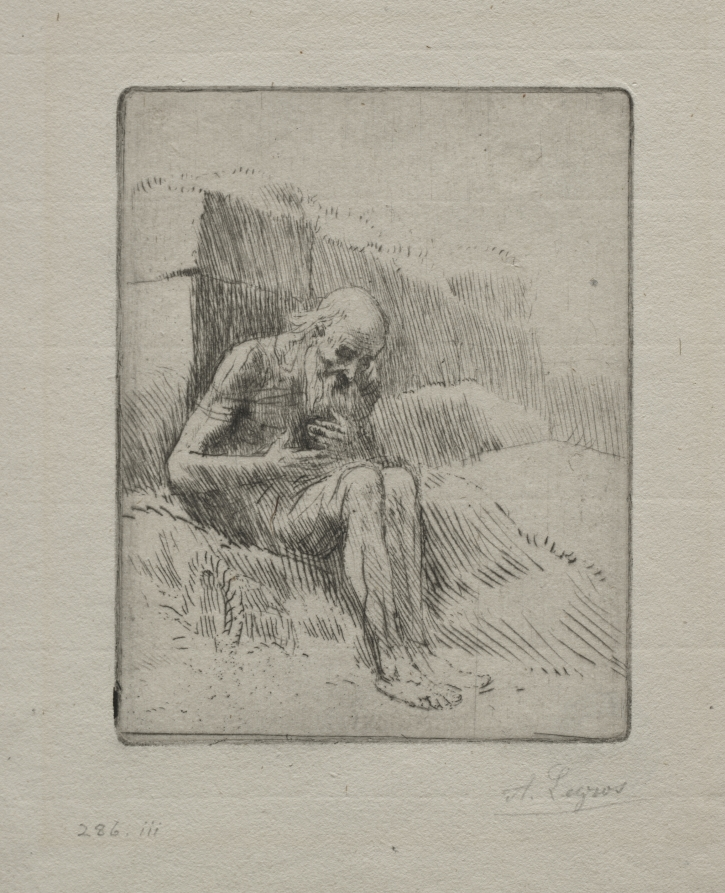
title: Job (Second Plate)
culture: France, 19th-20th century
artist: Alphonse Legros (French, 1837–1911)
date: 1884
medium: etching and drypoint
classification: Print